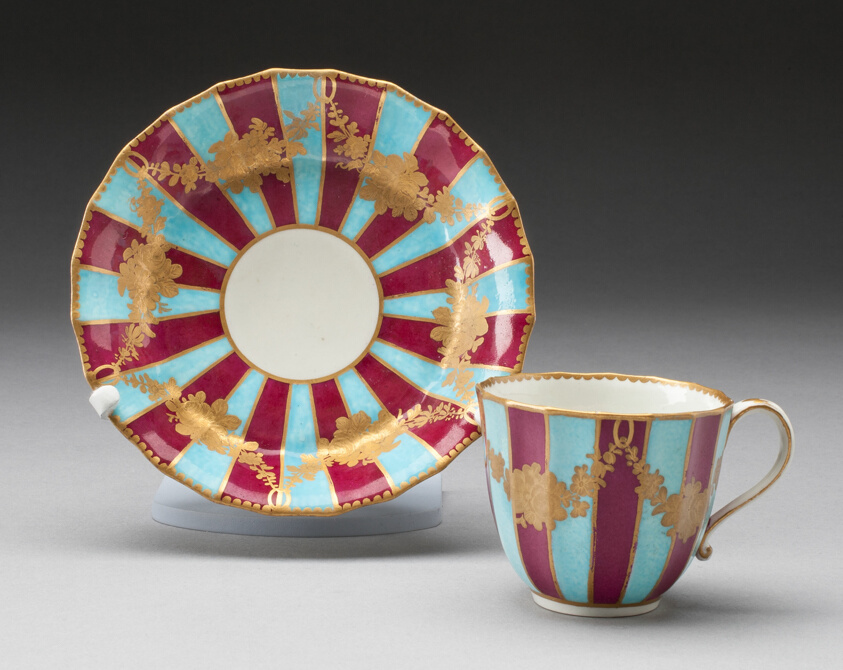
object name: Ceramics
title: Cup and Saucer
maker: Worcester Porcelain Factory (Warmstry House Period, 1751–1783); Worcester, England, founded 1751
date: c. 1770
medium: Soft-paste porcelain with polychrome enamels and gilding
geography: Worcester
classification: drinking vessel; teaware; ceramics; porcelain; european decorative arts